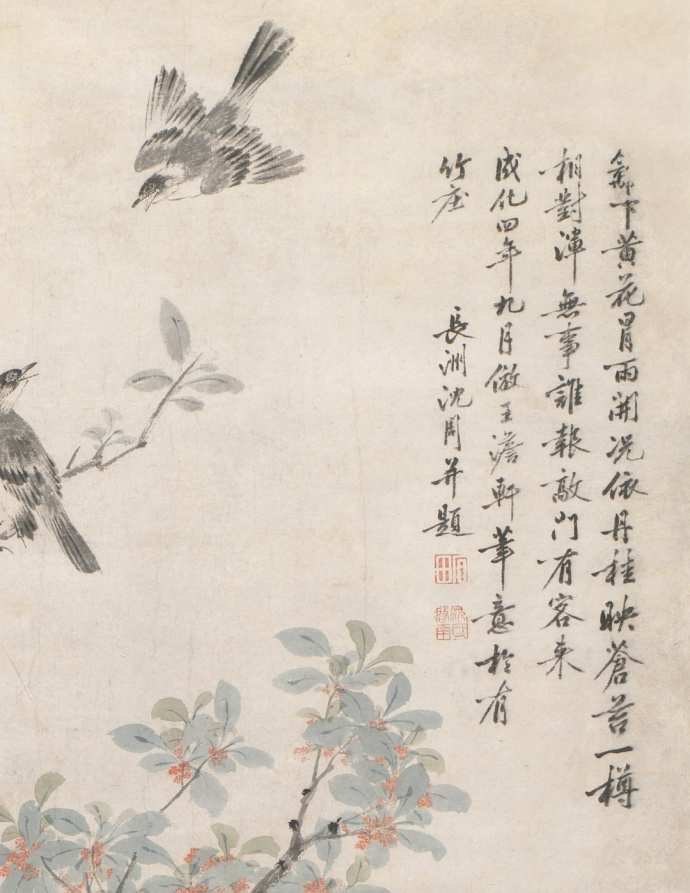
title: Yellow Chrysanthemums and Red Osmanthus in the Style of Wang Yuan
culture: China, Ming dynasty (1368–1644)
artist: Shen Zhou (Chinese, 1427–1509)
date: 1468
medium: hanging scroll, ink on paper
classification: Painting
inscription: Artist's inscription, signature, and 2 seals at upper right: Beneath the fence yellow [chrysanthemum] flowers brave the rain to blossom;/ Still others lean on the red osmanthus tree and dazzle the deep green moss./ With a goblet [of wine] I face them, entirely without concern;/ Who will answer the knocking at the gate where a guest has arrived? In the ninth month of the fourth year of the Chenghua era [1468], I followed the brush-conception of Wang Danxuan 王澹軒 [Wang Yuan 王淵] at the Youzhuzhuang 有竹庄 [House with Bamboo]. Inscribed and [painted] by Shen Zhou 沈周 of Changzhou 長洲. [seals] Shitian 石田; Shen shi Qinan 沈氏启南. trans. HR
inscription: 1 additional inscription, dated 1523, and 2 seals of Wang Chong 王寵 (1494-1533).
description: Shen Zhou, a native from Suzhou, was descended from a prominent land-owning family with strong ties to literati culture. Because Shen Zhou never entered government service, he had ample opportunity to cultivate the arts of painting, poetry, and calligraphy. Chrysanthemums and red osmanthus both bloom in autumn. The deep orange osmanthus flowers emanate a characteristically sweet fragrance. According to his inscription on the painting, Shen Zhou sought to imitate the style of the Yuan dynasty (1271–1368) painter Wang Yuan. His color-filled brushstrokes and washes, however, anticipate the flower painting style of Yun Shouping, whose Peonies are also in the Cleveland Museum of Art collection, https://www.clevelandart.org/art/1967.192. The sheer size and complex composition of this scroll are impressive.